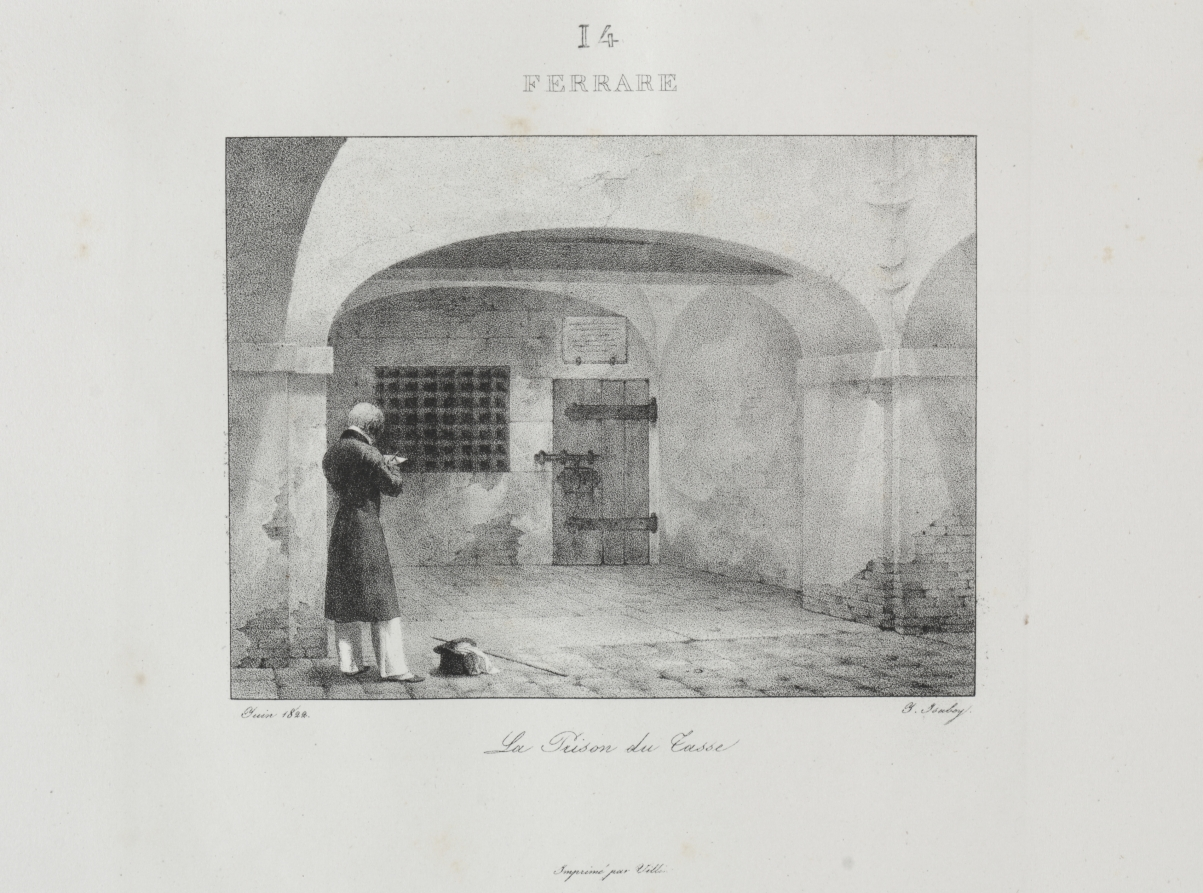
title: Voyage en Italie en 1822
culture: France, 19th century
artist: Jean-Baptiste Isabey (French, 1767–1855)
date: 1833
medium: lithograph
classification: Bound Volume